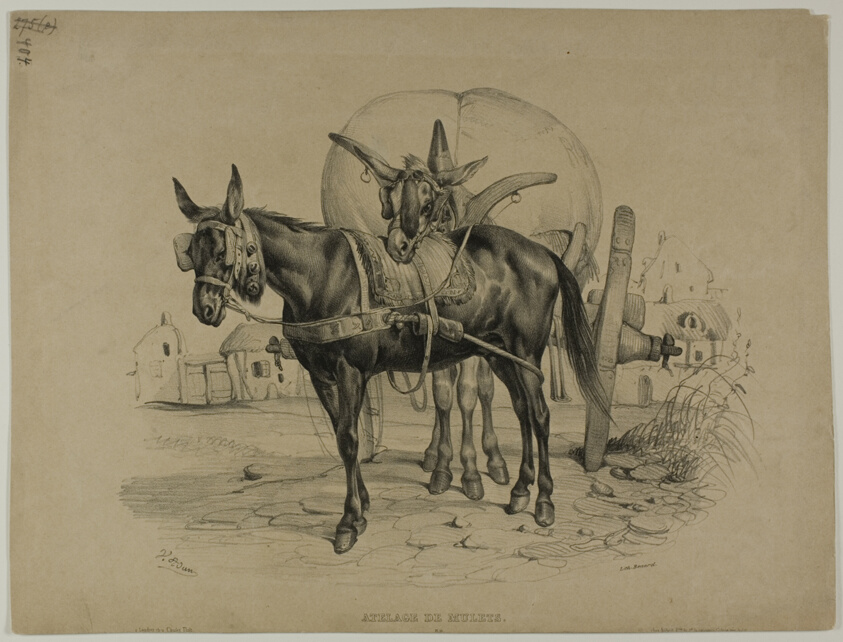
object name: Print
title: Mules Harnessed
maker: Victor Adam; French, 1801-1866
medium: Lithograph in black on tan wove paper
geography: France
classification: lithograph; print; prints and drawing